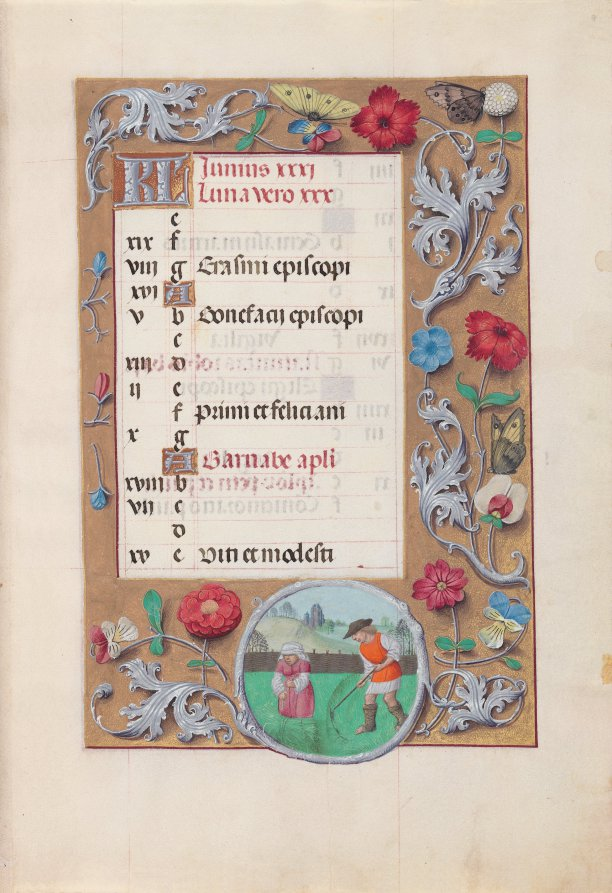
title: Hours of Queen Isabella the Catholic, Queen of Spain: Fol. 7r, June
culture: Flanders, Ghent and Bruges, late 15th century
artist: Master of the First Prayerbook of Maximillian (Flemish, c. 1444–1519)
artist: and Associates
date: c. 1500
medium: ink, tempera, and gold on vellum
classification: Bound Volume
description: A great lover of Flemish art, Queen Isabella treasured her many devotional books. This deluxe manuscript was created for her private devotions by highly organized and distinctly talented manuscript painters active in Ghent and Bruges. The Ghent-Bruges school represents the culmination of Flemish book painting, whose main features were the use of rich colors, illusionistic effects, a love of landscape, and a strong sense of visual narrative. Manuscripts produced by this circle of artists are renowned for their border decoration featuring a rich variety of realistically painted flowers, scrolling acanthus leaves, birds, and butterflies.